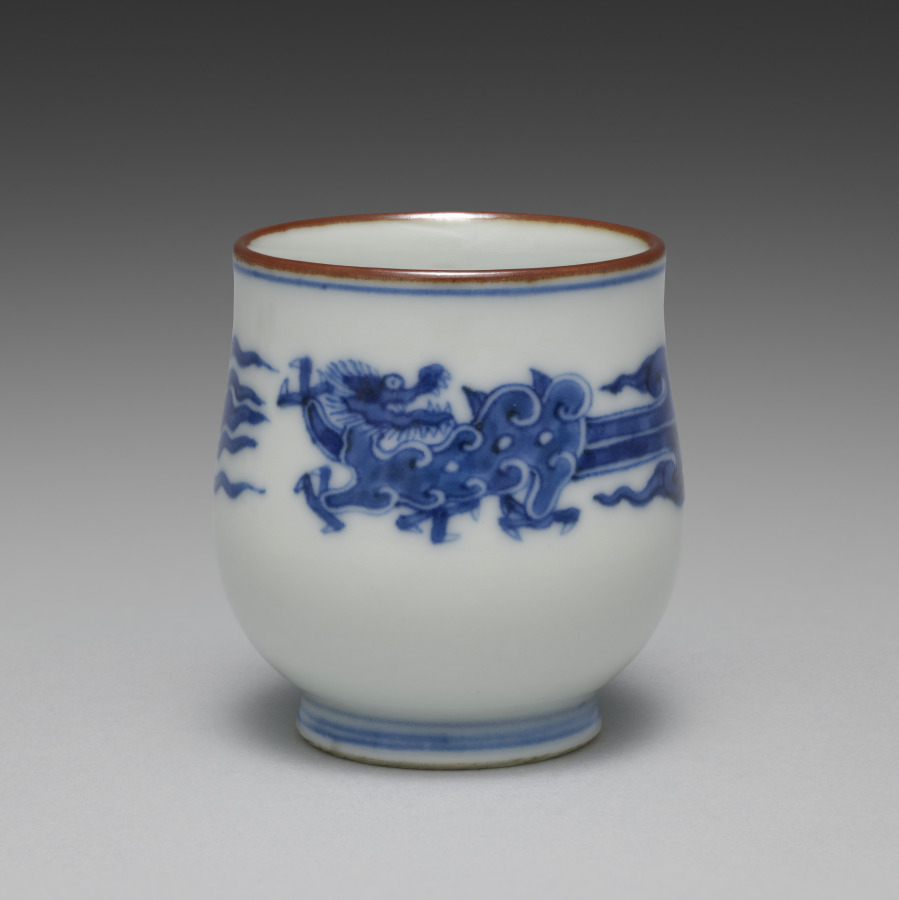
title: Cup from Sake Cups with Dragons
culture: Japan, Meiji period (1868–1912)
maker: Seifū Yohei III (Japanese, 1851–1914)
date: c. 1893–1914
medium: One from a set of six sake cups; porcelain with underglaze blue and iron oxide rims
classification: Ceramic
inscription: 大日本清風造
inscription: 清風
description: Each of these sake cups pictures two backward-looking dragons. The highly stylized creatures resemble jade carvings.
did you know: Seifū Yohei III was inspired by the Chinese mythical animals that were common on porcelain objects made at Jingdezhen in China during the Ming dynasty (1368–1644) and then exported around the world.